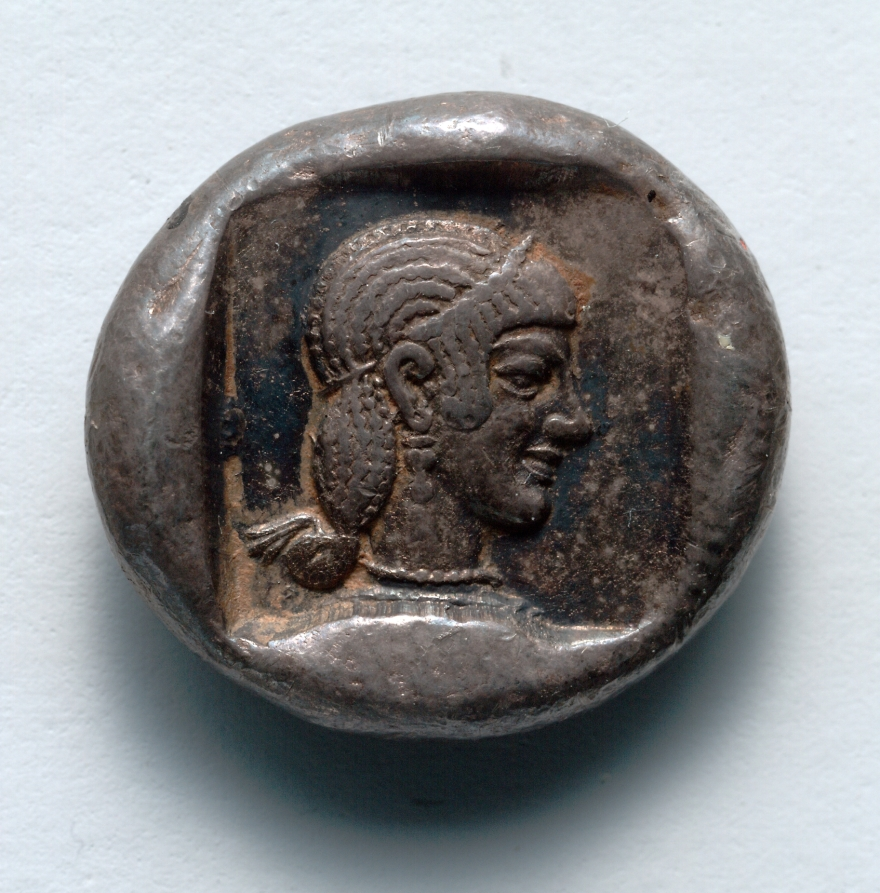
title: Drachm: Head of Aphrodite within Incuse Square (reverse)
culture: Greek, minted at Knidos (Karia)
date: 465–449 BCE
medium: silver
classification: Coins